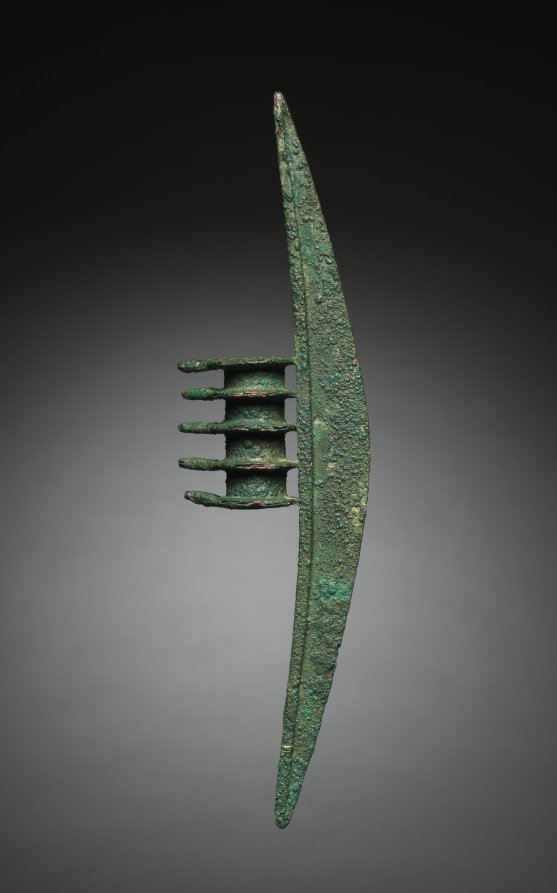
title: Crescent Axe Head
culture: Iran, Amlash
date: c. 1000 BCE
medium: bronze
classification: Arms and Armor